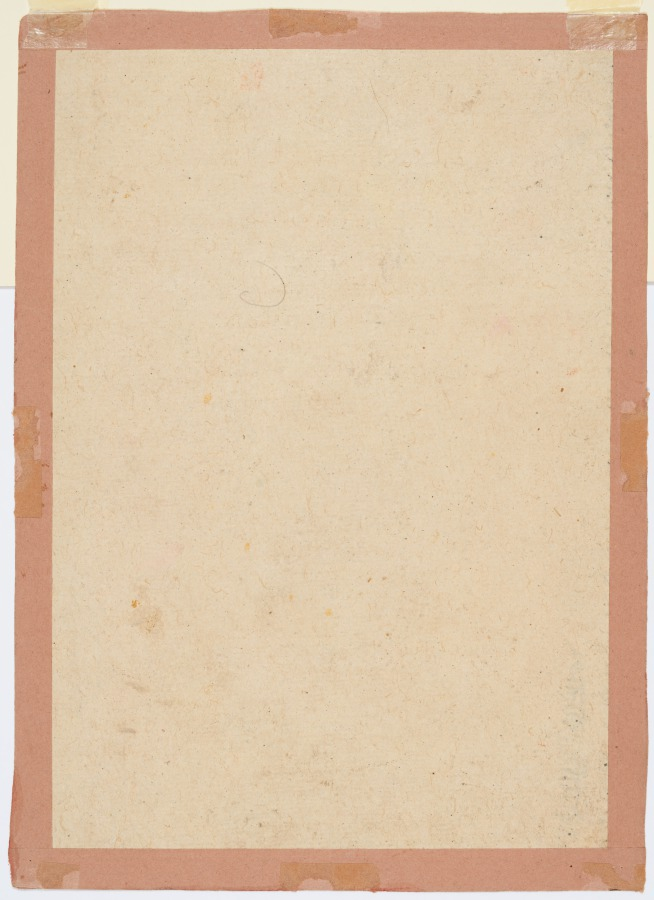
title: Shiva Seated on a Throne in a Landscape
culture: Northern India, Pahari kingdoms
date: c. 1755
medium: gum tempera on paper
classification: Painting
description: Shiva is depicted sitting on snakes coiled up together on a royal seat. The scene is set in a rocky mountainous setting with a row of trees in the background. In the paintings from Chamba, Shiva is usually depicted with a white complexion in three-quarter view. This formula has remained consistent for over a century with very few exceptions.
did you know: Shiva is clad in tiger hide wrapped around his waist.